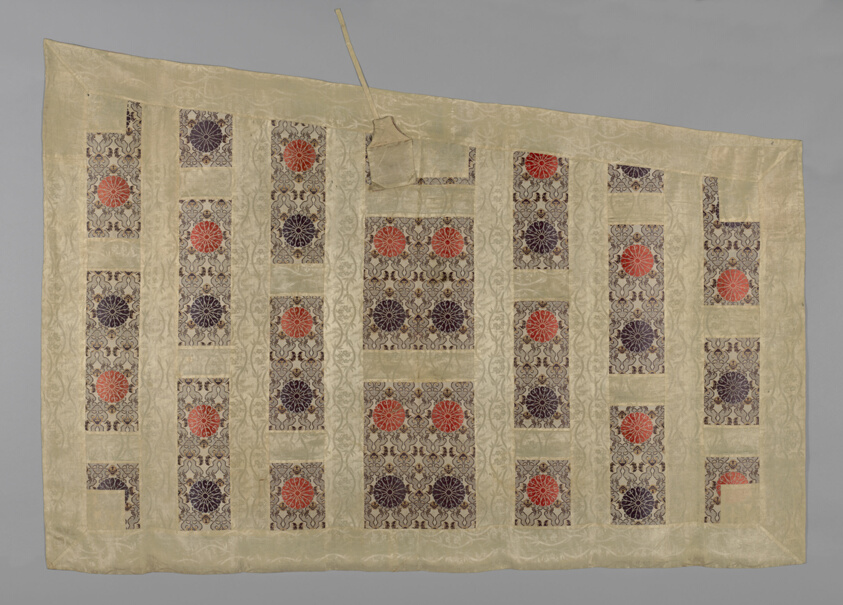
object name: Textile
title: Kesa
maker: Japan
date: Late 18th or early 19th century, Late Edo period (1789–1868)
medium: Silk; satin damask and twill weaves with secondary binding warps and supplementary patterning wefts; stenciled silver foil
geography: Japan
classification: textile; weaving - printed; liturgical - buddhist